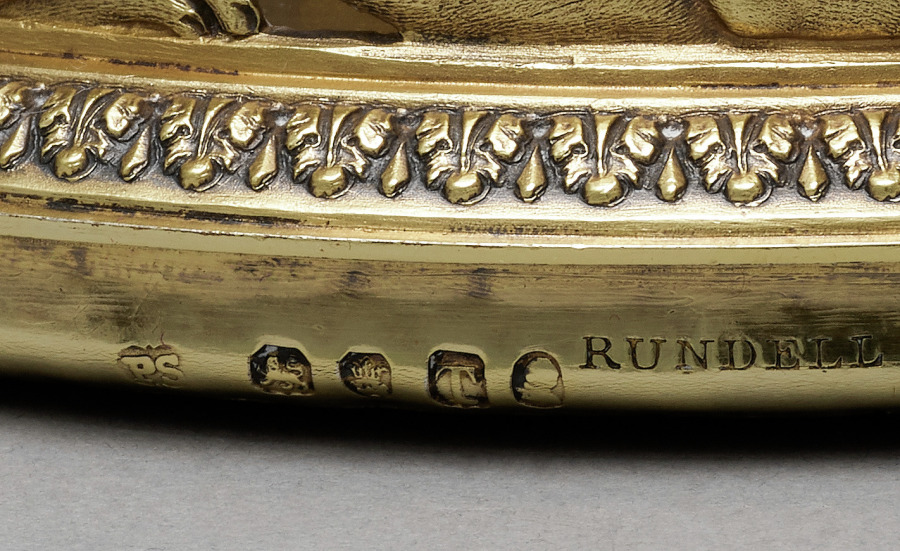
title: Decanter Stand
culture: England, London, 19th century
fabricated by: Paul Storr (British, 1771–1844)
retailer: Rundell, Bridge and Rundell (British, 1797–1834)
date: 1814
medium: silver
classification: Silver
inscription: Engraved on rim of base: "RUNDELL BRIDGE ET RUNDELL AURIFICES REGIS ET PRINCIPIS WALLIAE REGENTIS BRITANNIAS." Engraved on base of interior: Unidentifiable crest with bird over other animal.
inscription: Scratched on rim of base: "6625"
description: Decanter stands served as coasters for glass wine bottles in order to protect the extremely expensive and fragile linen tablecloths they sat upon. This example contains depictions of large grape vines and youthful figures that evoke the Roman god of wine, Bacchus (or Dionysus in Greek mythology). One of the young boys grasps an empty drinking vessel while the other leans against a panther, the frequent companion of Bacchus.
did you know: Bacchanal motifs of grapes and consumption echo this object’s function as a stand for a wine decanter.